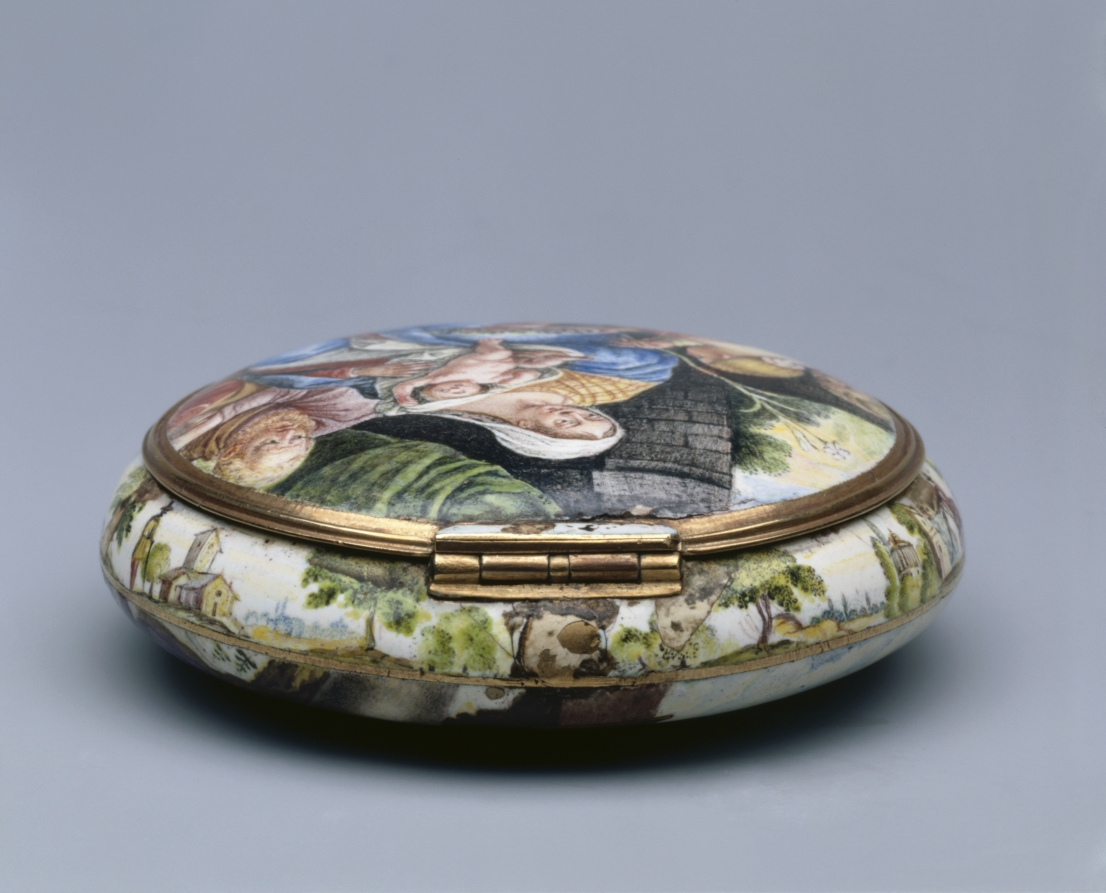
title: Watchcase (Boîtier de montre)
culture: France, 17th century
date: c. 1640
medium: gold and enamel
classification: Jewelry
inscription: [engraved on the rim]: "B8"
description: In the 1630s, the practice of painting with enamel on metal became a means for French miniature painters to achieve a more richly colored, durable product. Previously miniatures were painted with watercolor on vellum, a material made from animal skin. This case would have originally held a watch, but was later transformed into a simple box through the removal of the watch mechanism and ring. This watch case is richly painted inside and out with miniatures modeled after well-known religiously allegorical works.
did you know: Inspiration for the box’s miniatures was drawn from works by Peter Paul Rubens’ The Holy Family with Saints John the Baptist and Elizabeth (1615) (back panel) and Nicolas Cochin (interior base).